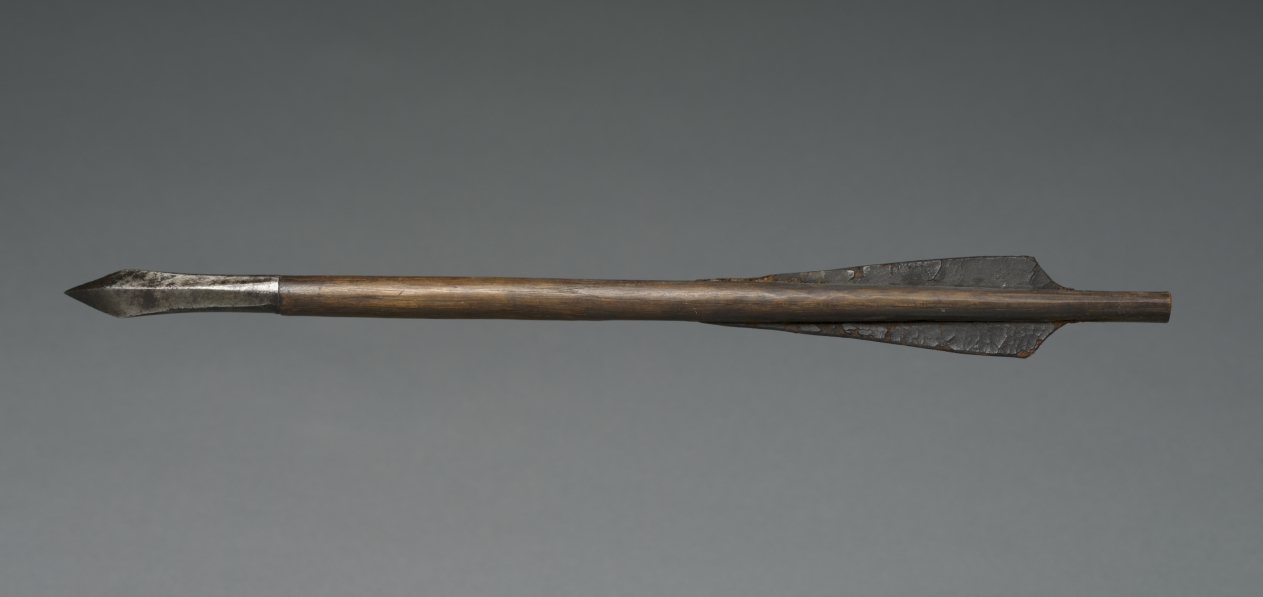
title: Crossbow Bolt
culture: Germany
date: 1500s–1600s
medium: wood, leather, steel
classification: Arms and Armor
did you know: Bolts with leather feathering were used mainly in the Tyrolean area, which includes northern Italy and western Austria.